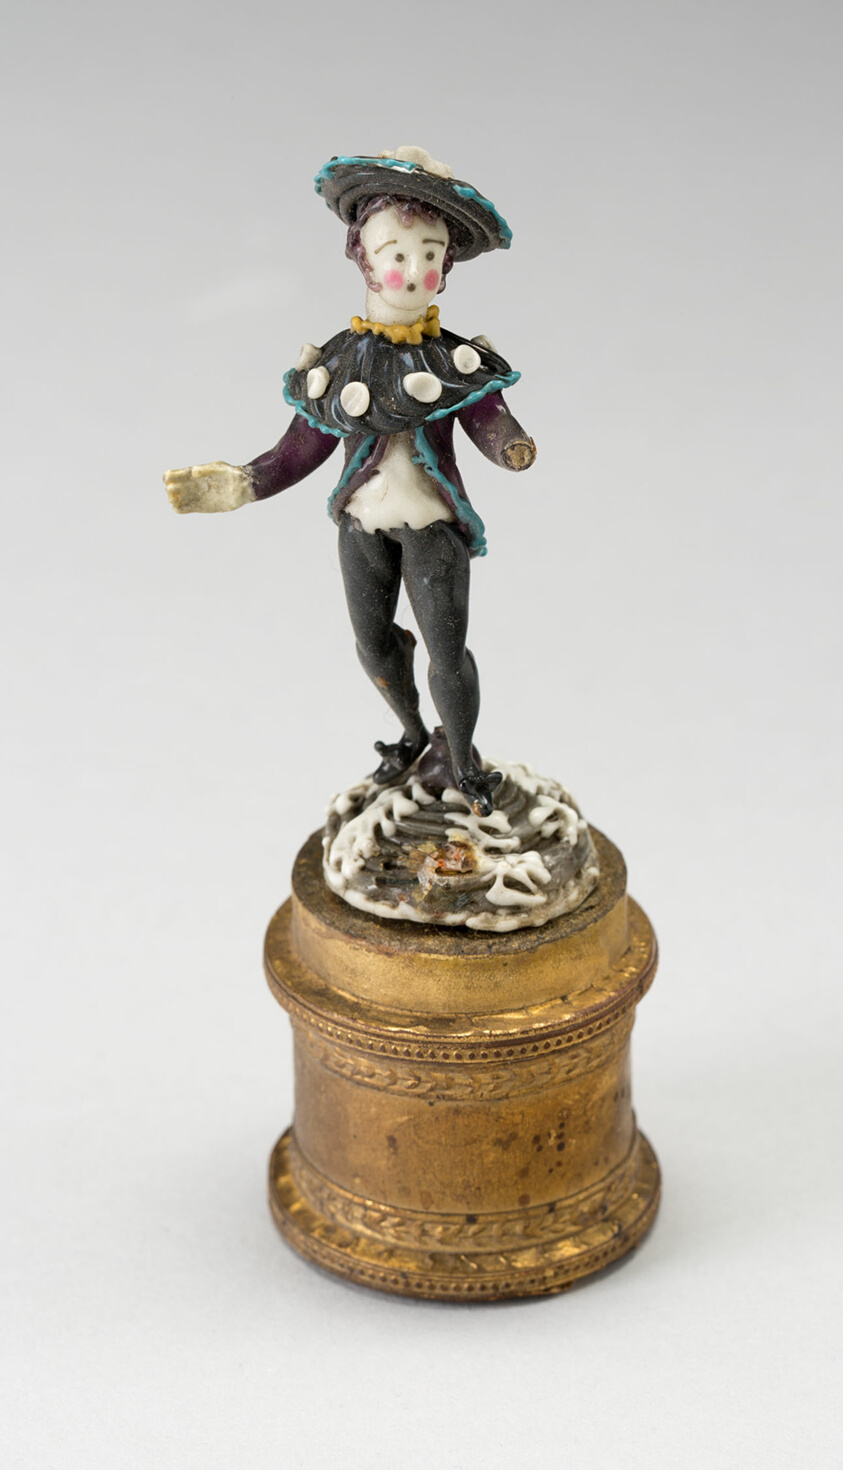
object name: Glass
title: Boy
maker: Nevers, France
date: 1700/50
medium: Glass; lampwork (verre de Nevers), metal armature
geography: France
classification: decorative object/ornament; lampwork; glass; european decorative arts